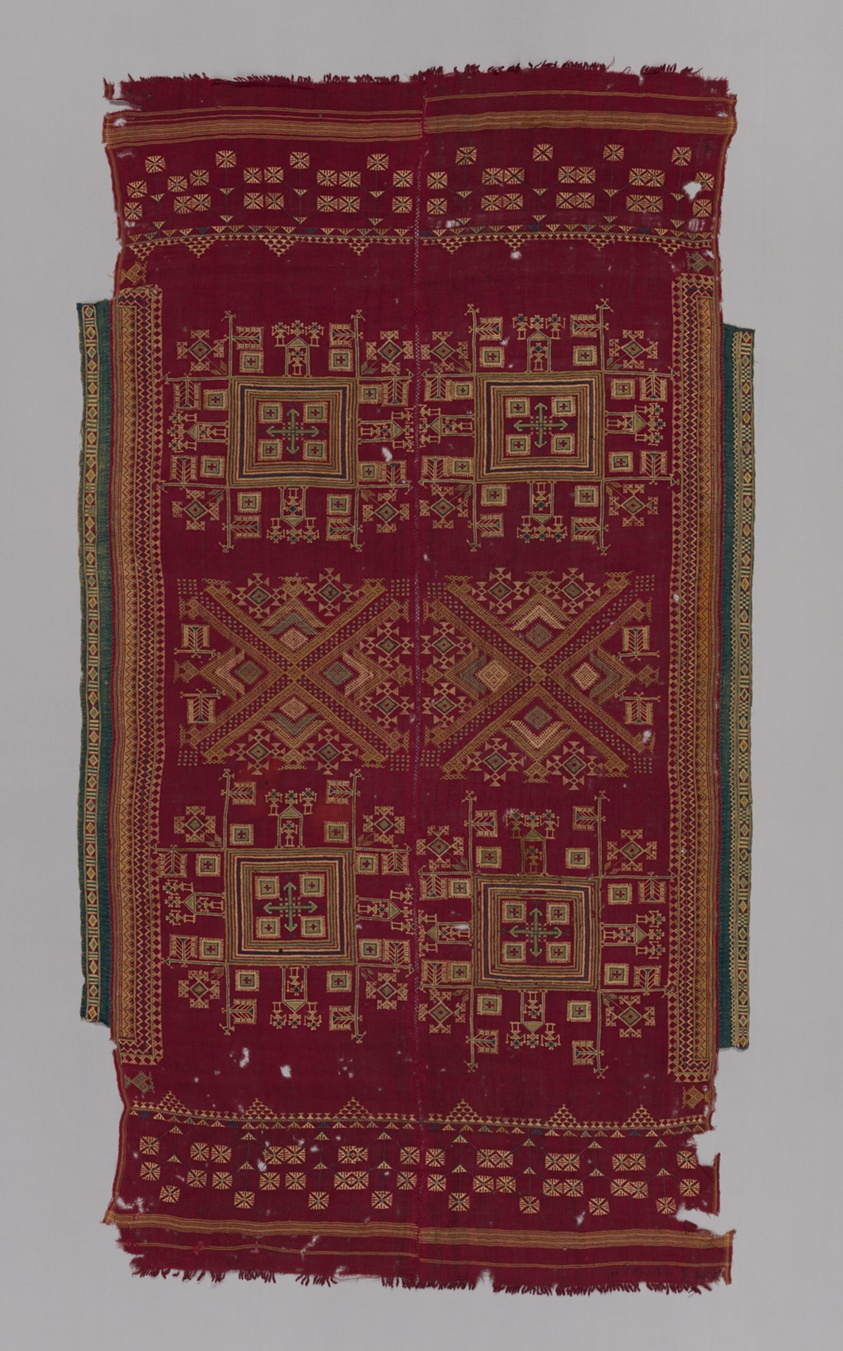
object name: Textile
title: Cover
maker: Turkey (Provincial)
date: 19th Century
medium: Cover, red, wool, hand woven and embroidered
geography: Turkey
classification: textile; weaving; needlework (visual works)